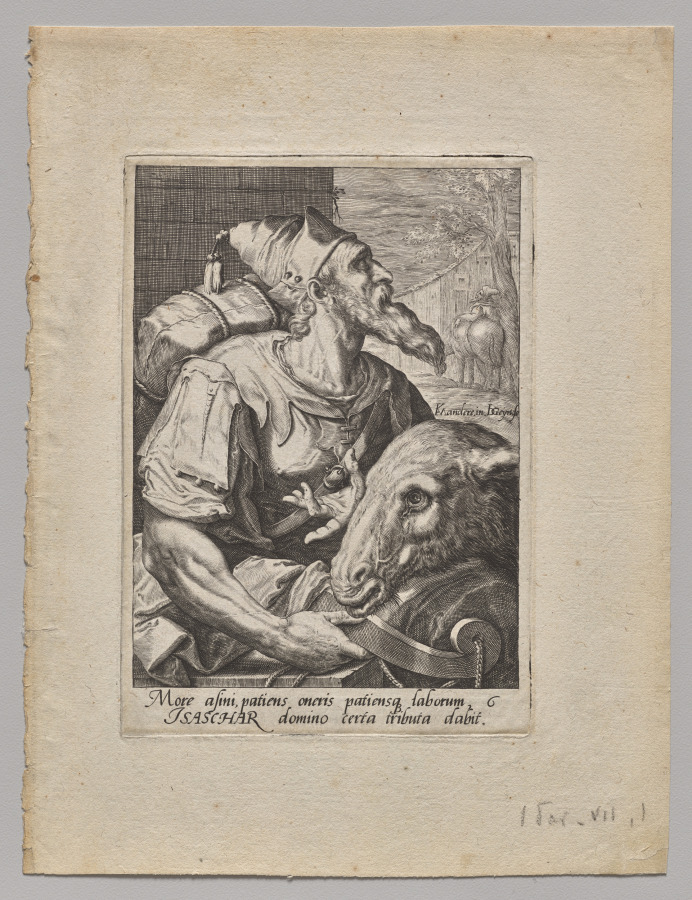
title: Plate 6: Isaachar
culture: Netherlands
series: The Twelve Sons of Jacob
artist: Jacob de Gheyn II (Netherlandish, 1565–1629)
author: after Karel I van Mander (Netherlandish, 1548–1606)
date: c. 1589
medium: engraving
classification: Print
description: In this print, the biblical figure Isaachar holds a rucksack while accompanied by a donkey, denoting his destiny to serve and perform hard labor. This is one of a series of prints depicting the twelve sons of Jacob, each with an attribute and costume that denotes his character. According to the Old Testament, Jacob blessed each of his twelve sons, prophesizing the destiny of their tribe, and assigning them a parcel of land in Canaan. The print series was made in the Netherlands in the late 16th century, a time of political struggle when Old Testament heroes were popular exemplars of fortitude and patience.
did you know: The rucksack carried by this Old Testament figure suggests his perpetual travel while the donkey denotes his employment as a laborer.